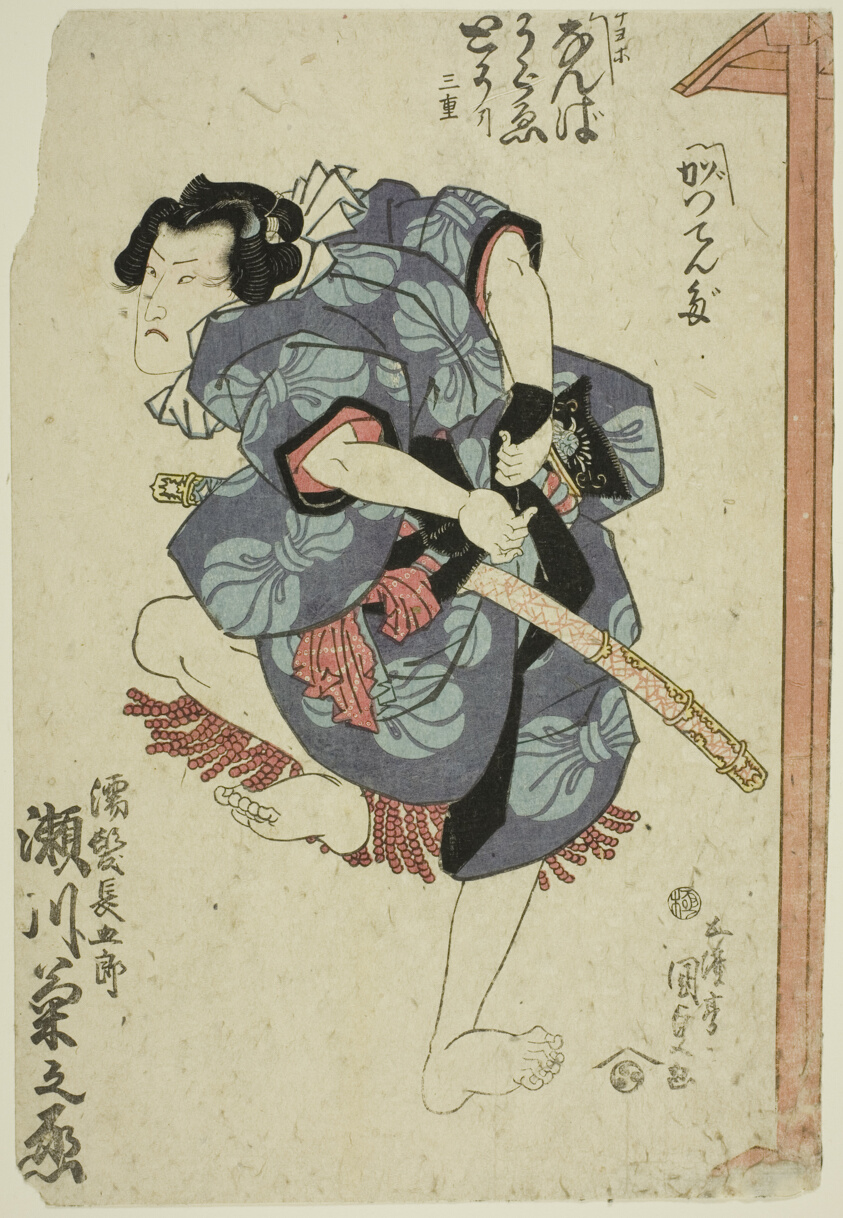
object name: Print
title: The actor Segawa Kikunojo V as Nuregami Chogoro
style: Japanese (culture or style)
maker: Utagawa Kunisada I (Toyokuni III) (Japanese, 1786-1864)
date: c. 1830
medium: Color woodblock print; oban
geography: Japan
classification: woodblock print; print; asian art